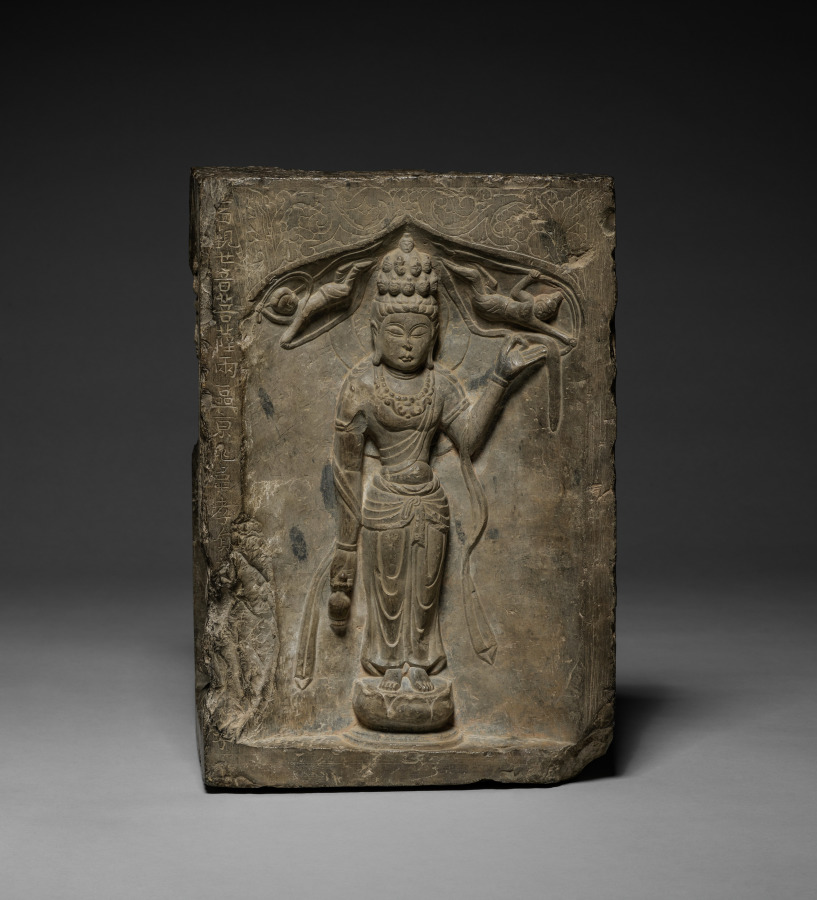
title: Corner Stone with Two Eleven-Headed Guanyin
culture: China, Tang dynasty (618-907)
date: c. 700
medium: stone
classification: Sculpture